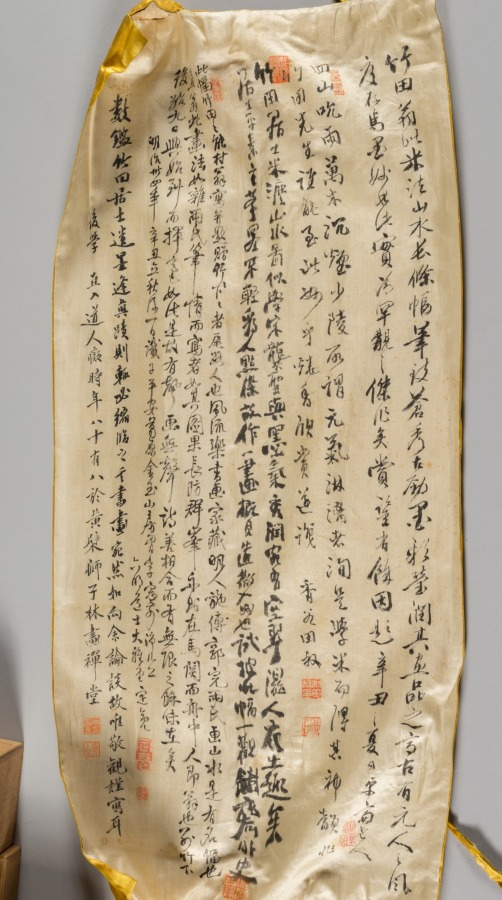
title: Mountain View and Blue Water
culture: Japan, Edo period (1615–1868)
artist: Tanomura Chikuden (Japanese, 1777–1835)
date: early 1800s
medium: hanging scroll; ink, color, and gold on paper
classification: Painting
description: Tanomura Chikuden was an eminent painter whose adopted son, Tanomura Chokunyū (1814–1907), was Seifū Yohei III’s painting teacher. This work was displayed at a gathering commemorating the 10th anniversary of Chokunyū’s death, something we know only because its custom-made box and archival documents have been carefully kept together. The box inscription also confirms that Chikuden was emulating the style of the Mi family of painters, active during China’s Southern Song dynasty (1127–1279). The painting’s Chinese-style silk wrapper is inscribed and sealed on its interior by members of Chokunyū’s community.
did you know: The mountain shapes are built up with multiple small wet strokes.